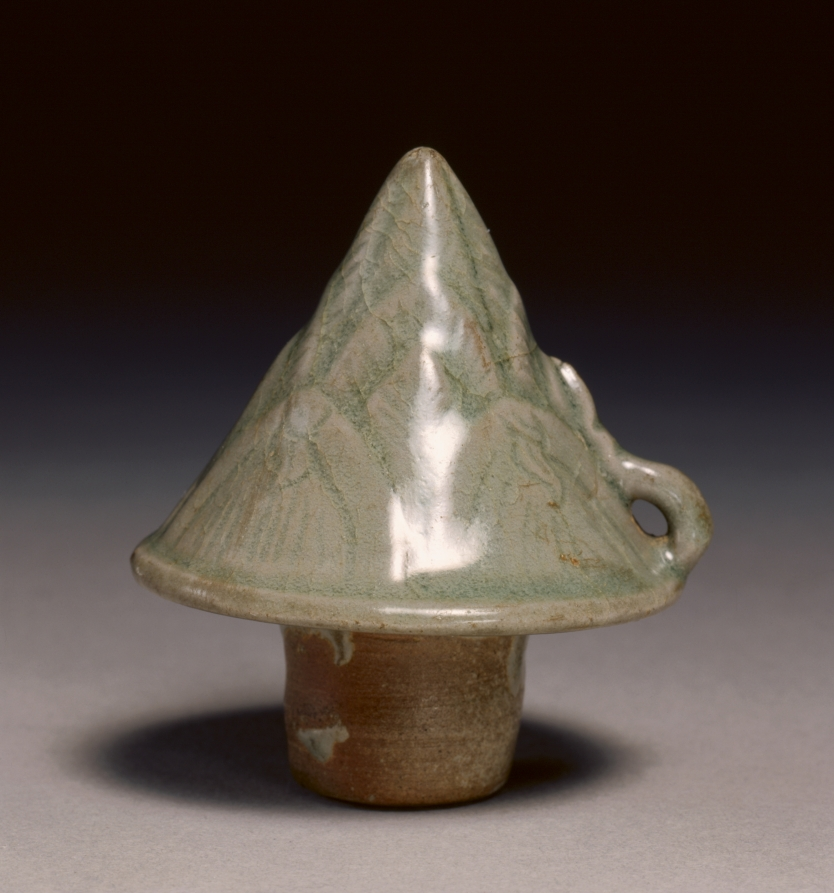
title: Lid for Bamboo Shoot-shaped Ewer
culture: Korea, Goryeo dynasty (918–1392)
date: 1100s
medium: earthenware with carved designs and celadon glaze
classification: Ceramic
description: Natural motifs inspired both the shape of celadon vessels as well as their inlaid designs in the Goryeo period. This wine ewer is shaped like a bamboo shoot, but it also resembles a lotus bud. Even though the spout was repaired, the ewer is a celadon masterpiece of the Goryeo period.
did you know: This lid was donated in 1998 for the bamboo-shaped wine pitcher (CMA 1928.179), but it turned out to be too big.